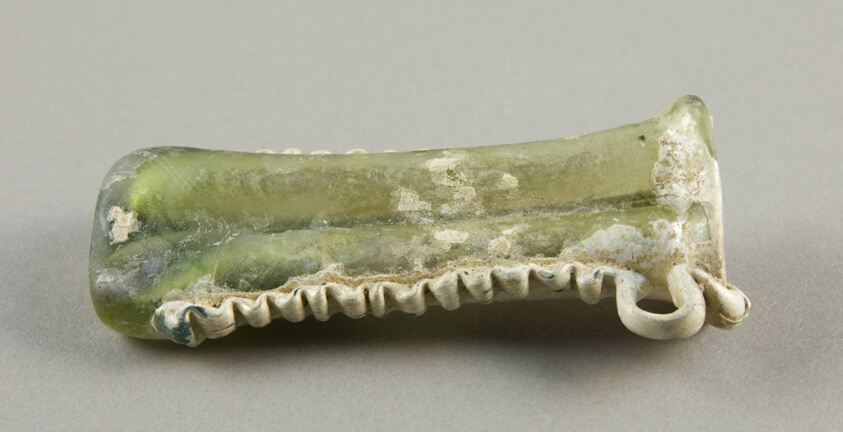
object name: Vessel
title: Cosmetic Container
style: syrian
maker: Roman; Levant or Syria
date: 4th century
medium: Glass, blown technique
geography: Syria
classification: glass; vessel; ancient art